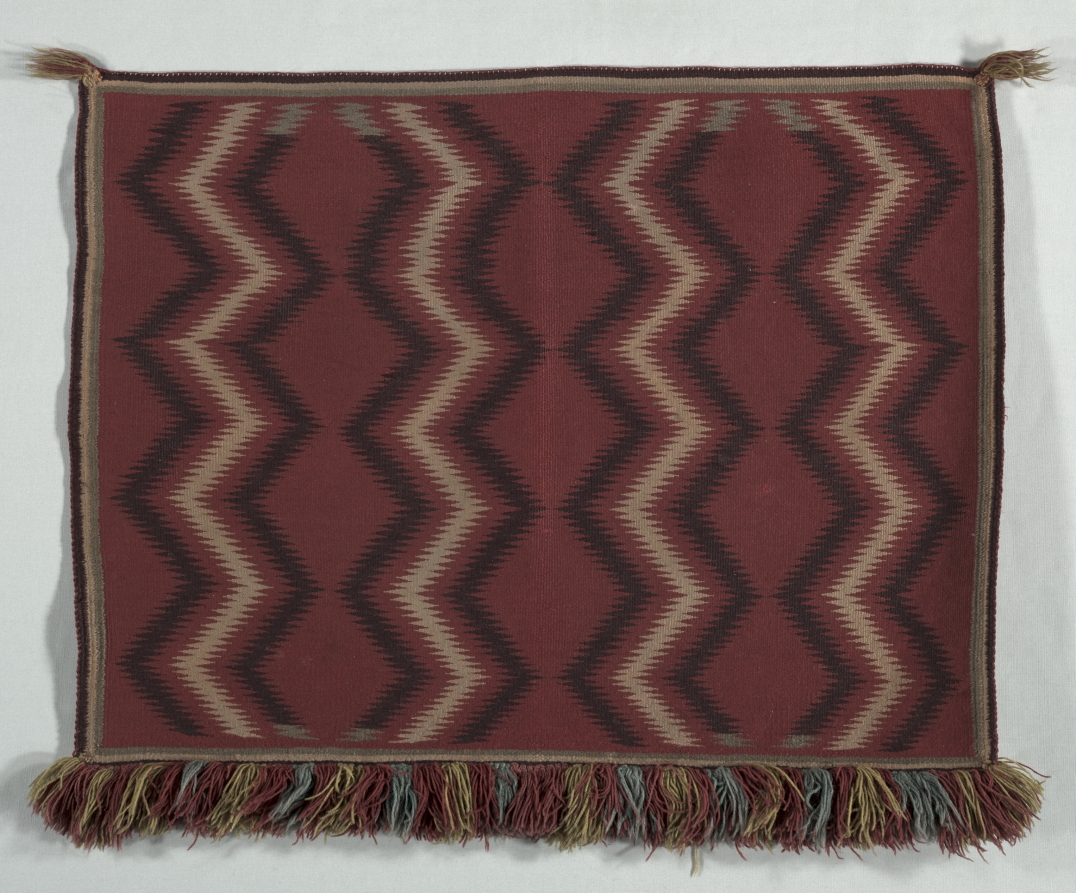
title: Germantown Eyedazzler Saddle Throw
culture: America, Native North American, Southwest, Navajo, Post-Contact, Late Classic Period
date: c.1875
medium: tapestry weave: cotton and wool (handspun and bayeta)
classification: Textile